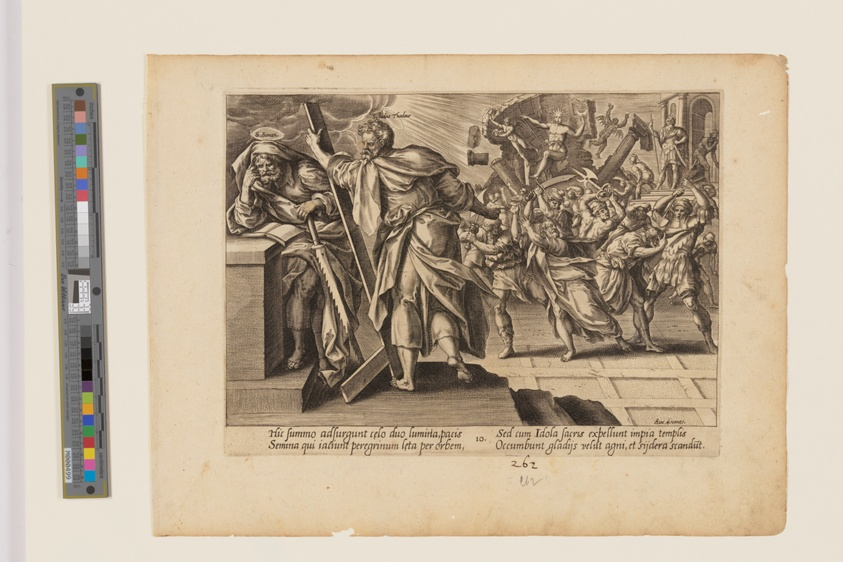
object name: Print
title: The Martyrdom of St Simon and Judas Thaddaeus, from The Martyrdom of Christ and the Apostles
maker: Hendrick Goltzius (Dutch, 1558–1617); after Maarten de Vos (Flemish, 1532–1603); published Hieronymus Cock (Netherlandish, c. 1510–1570)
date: c. 1578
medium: Engraving on ivory laid paper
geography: Netherlands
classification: engraving; paper; print; prints and drawing